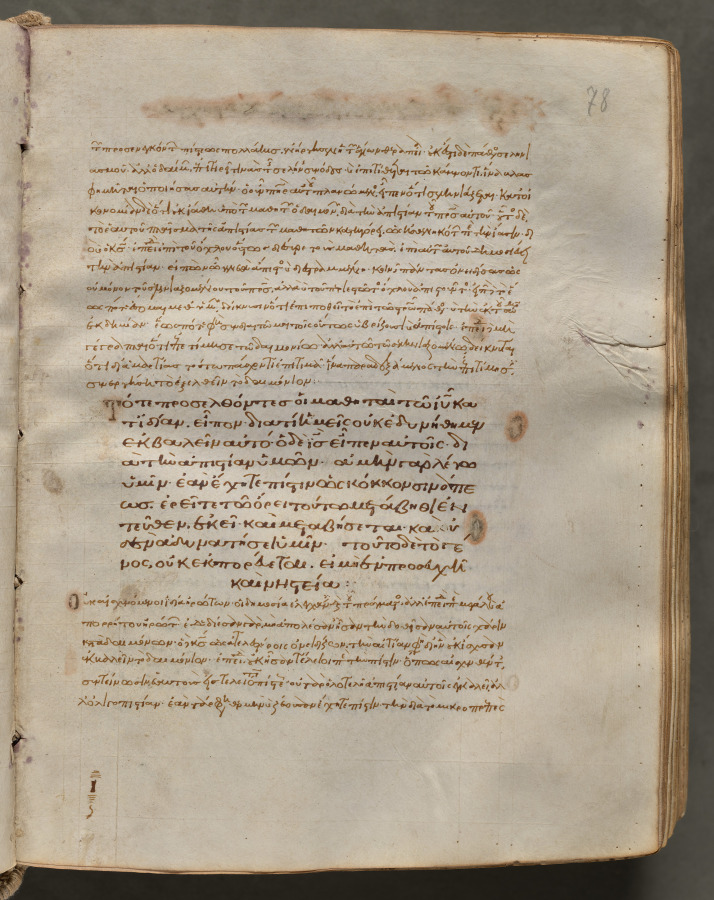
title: Text, folio 78 (recto), from a Gospel Book with Commentaries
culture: Byzantium, Constantinople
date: c. 1000–1100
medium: ink, tempera, and gold on vellum; leather binding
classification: Bound Volume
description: Each of the four gospels in this book opens on a page with brilliantly illuminated borders depicting the author of the text as well as birds-principally peacocks, symbols of the immortality of the soul-and fountains, representing the fountain of life and the salvation of the soul. This volume consists of 428 leaves with texts in Greek. Its level of sophistication suggests that it was probably written and decorated in a monastery in Constantinople.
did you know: Gospel Books were carried in procession through Byzantine churches.